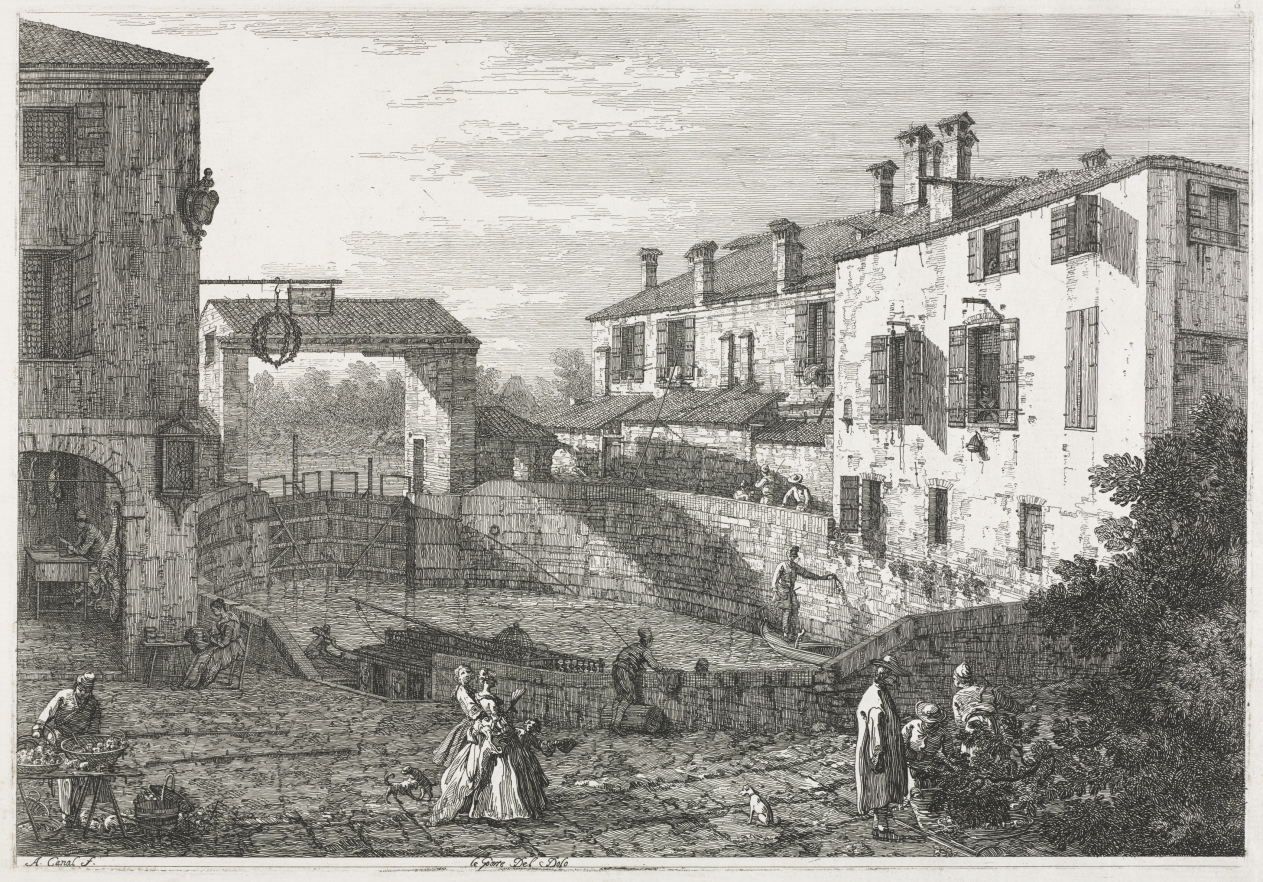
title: Views: The Canal Lock at Dolo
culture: Italy, Venice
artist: Antonio Canaletto (Italian, 1697–1768)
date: 1735–46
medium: etching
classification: Print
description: Antonio Canaletto took up etching as an extension of his painting practice, which consisted of representing topographical views of Venice for wealthy patrons. This print belongs to a series he made of rural scenery outside the city—here, the village of Dolo and its canal. Etching provided the artist with a means of formal experimentation, and he became a master of describing Venice’s distinctive buildings and the reflections and shadows from its many canals. Prints also provided the artist with a steady income; this series was likely marketed to affluent British tourists as a souvenir.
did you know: Dolo, the town depicted here, was a popular site of country homes for wealthy inhabitants of Venice nearby.